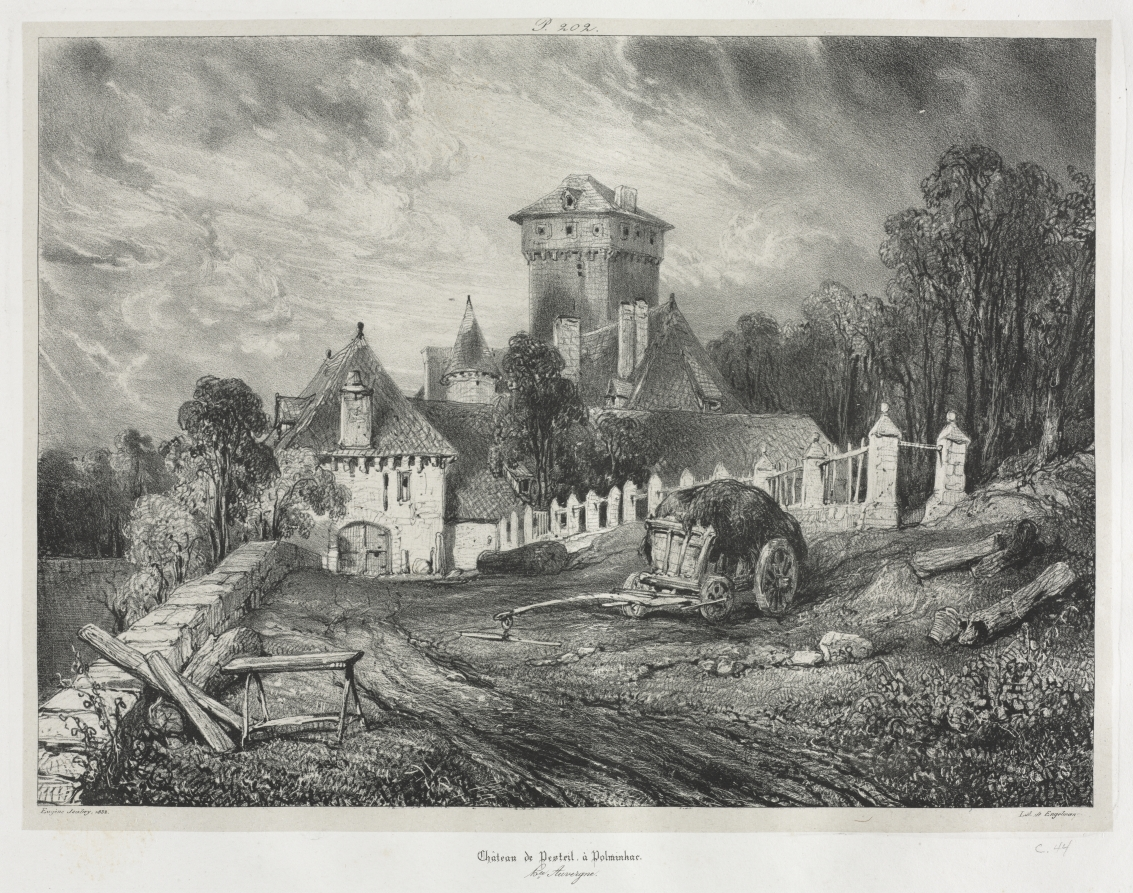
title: Picturesque and Romantic Journeys in Old France: Auvergne (vol. II): Pesteil Chateau at Polminhac, Plate 202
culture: France, 19th century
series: Plate 202 from Voyages Pittoresques...Auvergne vol. II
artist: Eugène Isabey (French, 1803–1886)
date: 1832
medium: lithograph on chine collé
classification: Print